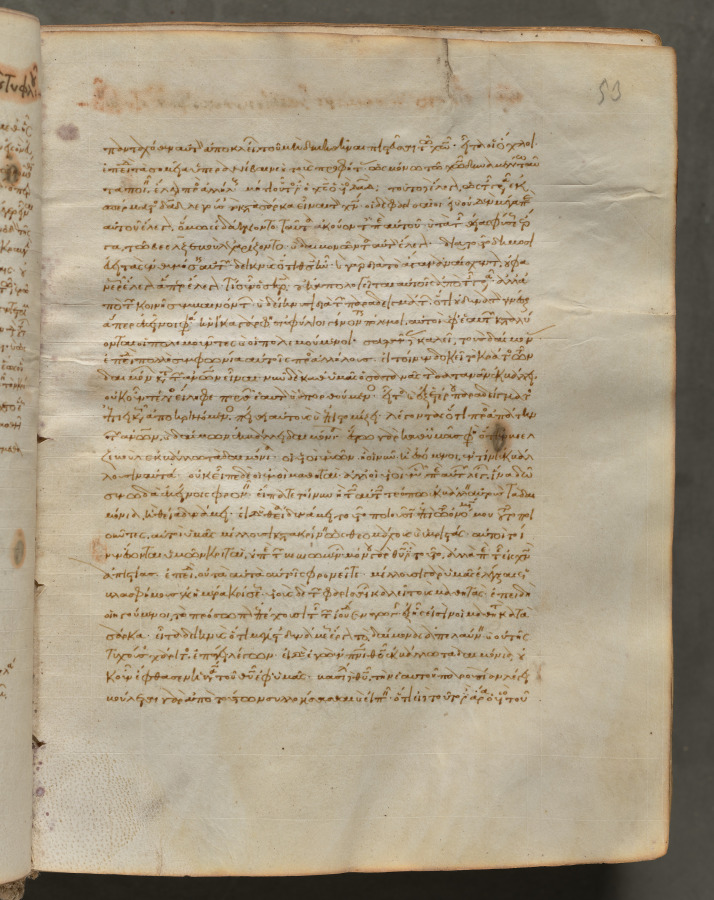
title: Text, folio 53 (recto), from a Gospel Book with Commentaries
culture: Byzantium, Constantinople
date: c. 1000–1100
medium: ink, tempera, and gold on vellum; leather binding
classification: Bound Volume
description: Each of the four gospels in this book opens on a page with brilliantly illuminated borders depicting the author of the text as well as birds-principally peacocks, symbols of the immortality of the soul-and fountains, representing the fountain of life and the salvation of the soul. This volume consists of 428 leaves with texts in Greek. Its level of sophistication suggests that it was probably written and decorated in a monastery in Constantinople.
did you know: Gospel Books were carried in procession through Byzantine churches.